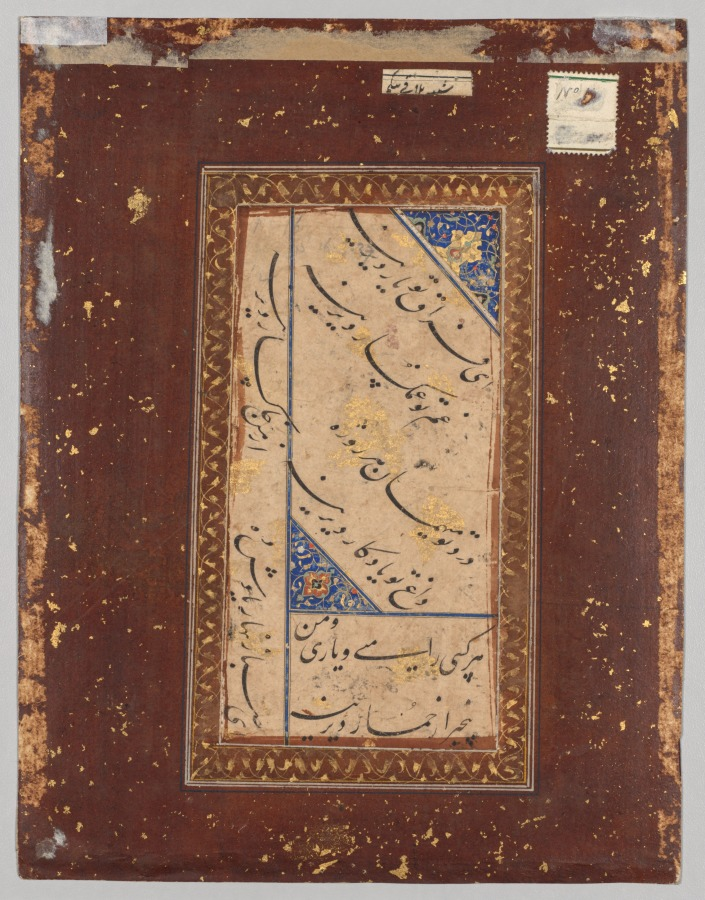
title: Calligraphy of a ghazal of Amir Khusrau Dihlavi (Indian, 1253–1325) (verso)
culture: India, Farrukhabad, Mughal, 18th century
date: c. 1760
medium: Gum tempera, ink, and gold on paper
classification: Calligraphy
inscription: verso: six lines of Persian poetry in nast 'aliq calligraphy